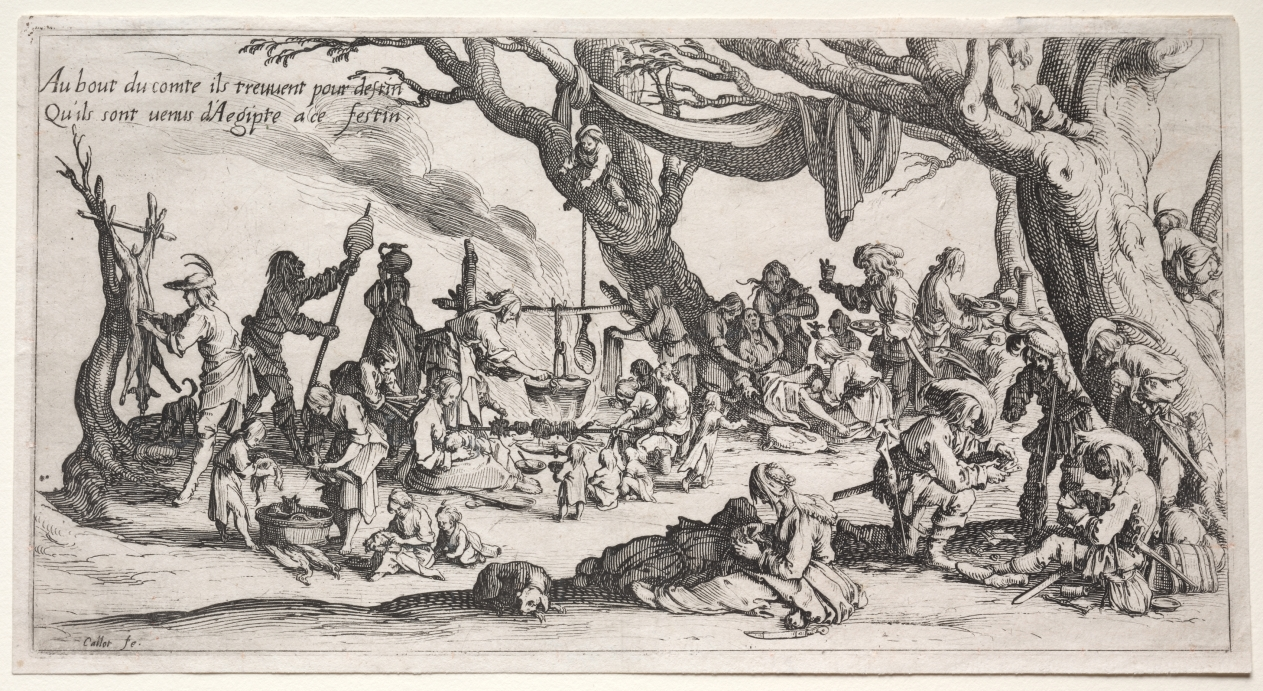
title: The Stopping Place: The Feast of the Bohemians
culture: France, 17th century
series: The Bohemians:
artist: Jacques Callot (French, 1592–1635)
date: c. 1621–25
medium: etching and engraving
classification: Print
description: Jacques Callot, a masterful draftsman, spent the greater part of his life at the ducal courts of Tuscany and Lorraine, where he produced prints to record festivals and theatrical performances. He also executed religious subjects and scenes reflecting many aspects of daily life including war, pervasive in 17th-century Europe. When returning to France from Italy, Callot probably saw bands of rootless men, women, and children-a common sight-which became the subject of The Bohemians. He conceived of these four prints as a long frieze; the lines in each of the sheets extend into the sheet that follows. The first two scenes depict a procession of scrawny horses and disheveled families in tattered, exotic clothing. The last two show these vagrants pillaging a farm and then enjoying a feast. The inscriptions, from left to right, comment on the action: The only things these poor fortune-telling beggars carry with them are things yet to come. Are these not fine messengers, straying through foreign lands? You who take pleasure in their words, watch out for your blancs, testons and pitolles (coins). When all is said and done, they find that their fate is to have come from Egypt to this feast.